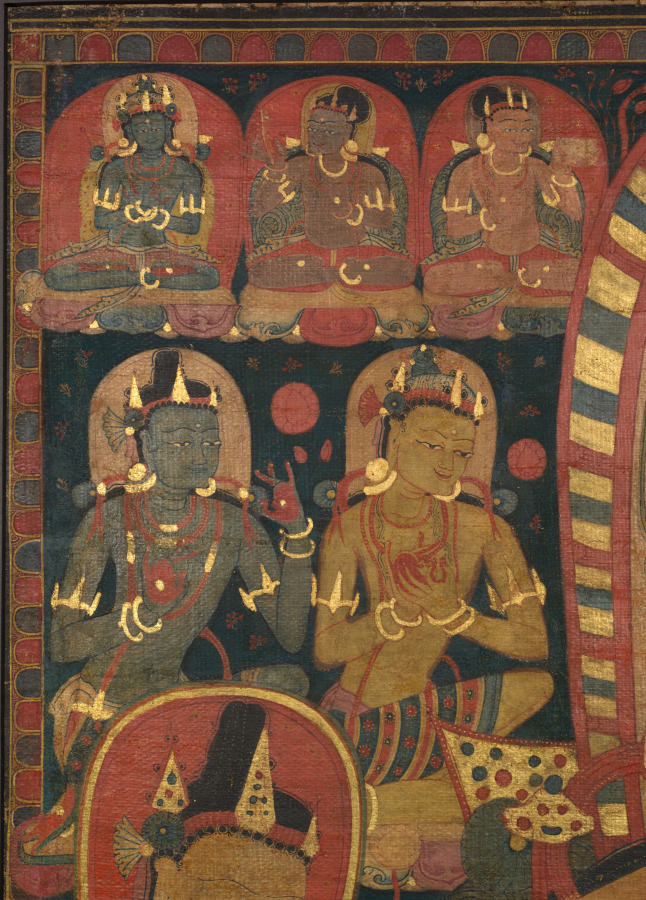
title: Tantric Buddha Vairochana as Vajrasattva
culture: Central Tibet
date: c. 1150–1200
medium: gum tempera, ink, and gold on cloth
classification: Painting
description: The seated Buddha dominating the composition is identified as Vairochana because of his hand gesture, the mudra communicating supreme enlightenment in which the index finger of one hand is grasped by the fingers of the opposite hand. His golden color and the tiny vajra—a six-pronged ritual object representing a thunderbolt—balanced on top of his finger suggest that he is in the guise of Vajrasattva, the summation of all enlightened beings. In his crown is the image of a monk, who is probably the guru of the donor, the small monastic figure at the lower right next to the lotus pedestal.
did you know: A mantra written behind the figures invokes their living presence in the thangka painting.